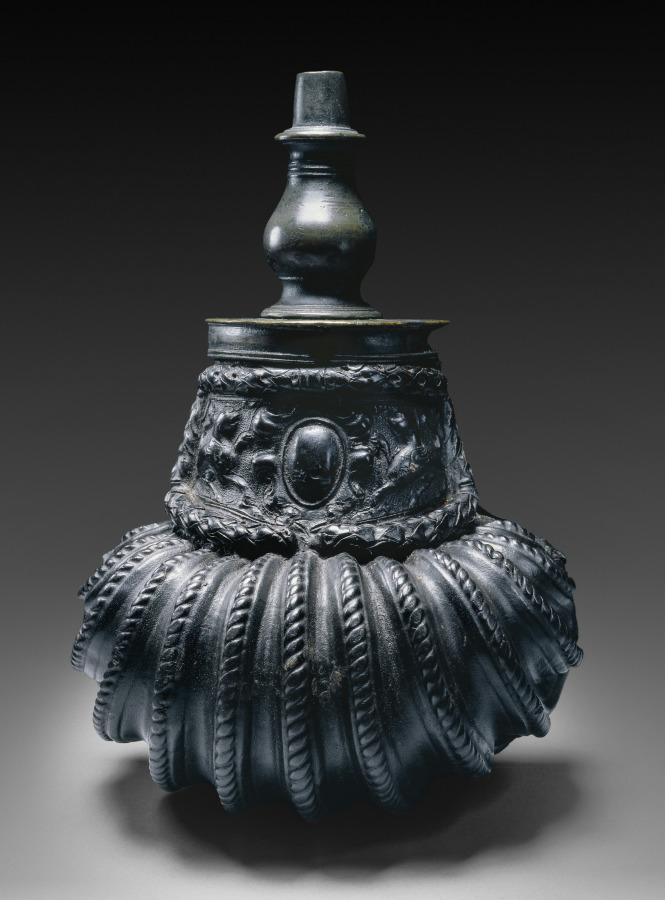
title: Powder Flask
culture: Italy, 16th century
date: c. 1560–1570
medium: leather (cuir bouilli) with embossed and fluted decoration; brass funnel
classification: Arms and Armor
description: Powder flasks are small, portable containers designed to hold gunpowder. From the 1400s to the 1800s, powder flasks were indispensable for charging and priming firearms of all types. Without powder flasks firearms were of little use to their owners. Many highly decorated flasks rank as works of art.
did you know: This flask is an exceptionally fine example of Italy Renaissance tooled leatherwork known as cuir bouilli (molded and hardened leather).